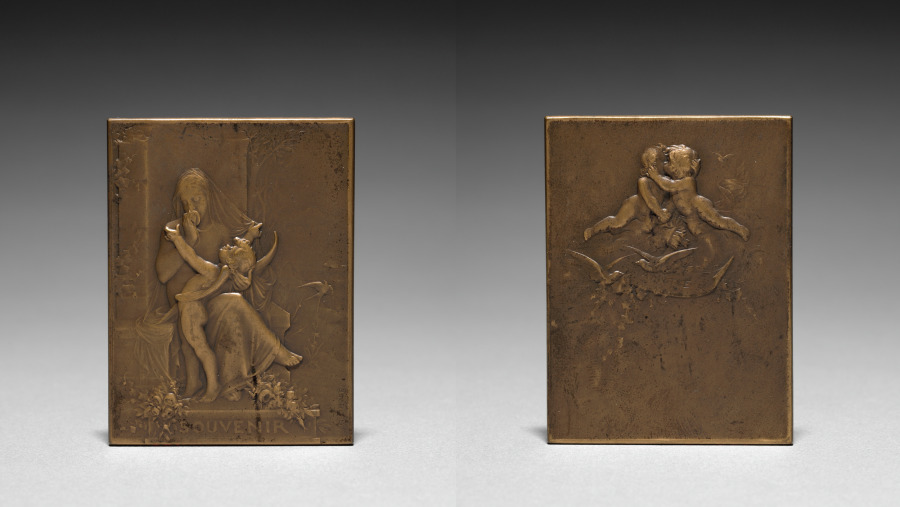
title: Medallion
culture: France, 19th-20th century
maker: Georges Dupré (French, 1869–1909)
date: c.1900–1921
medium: bronze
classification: Plaque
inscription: "Souvenir"; signed: "G. Dupré."